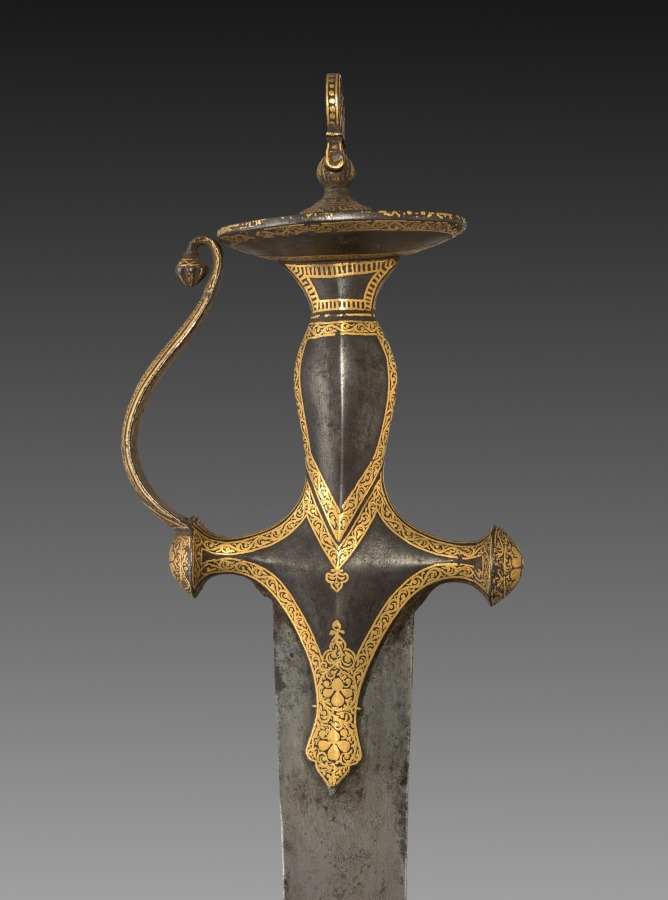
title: Silapa Sword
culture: India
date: 1700s–1800s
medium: gold with inlay and leather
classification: Arms and Armor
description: The exceptionally thin, curved blade is made of watered steel. The grooves, called fullers, allowed for weight reduction and prevented flexion. The costly hilt is fully overlaid with brass in steel, both inside and outside the knuckle.